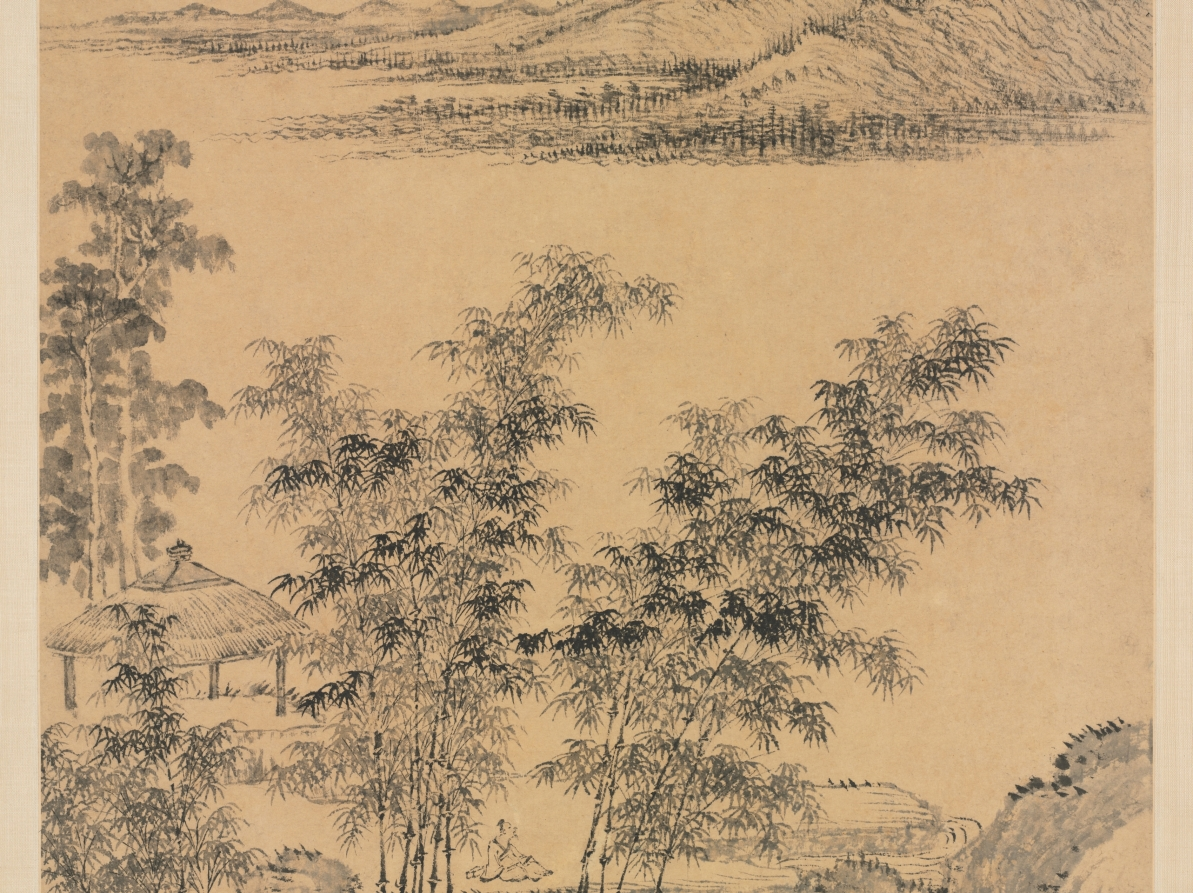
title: Tall Bamboo and Distant Mountains, after Wang Meng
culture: China, Qing dynasty (1644-1911)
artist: Wang Hui (Chinese, 1632–1717)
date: 1694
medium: Hanging scroll; ink on paper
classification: Painting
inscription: 昔文湖州有暮靄橫看。宋思陵題識卷首：觀其筆力不在郭煕之下。於樹石間寫叢竹，乃自其肺腑中流出，又不可以筆墨畦徑觀也。 子文廣文出紙求畫修竹遠山。惜乎僕之筆力，不能似郭。又敢彷彿湖州也哉？至若拙朴鄙野，縱意塗抹，聊可以寫一時之趣。姑塞廣文之雅意云。黃鶴山中人王蒙書。 歲次甲戌九月望後三日為冝翁先生臨于長安寓齋。海虞, 王翬。[印]王翬之印; 石谷子.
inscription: 3 additional seals: 1 of Pang Yuanji 龐元濟 (1864–1949); 2 unidentified.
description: Wang Hui studied paintings by earlier masters and digested their styles with unceasing virtuosity. He had such enduring affection for a landscape by Wang Meng 王蒙 (about 1308–85) that between 1686 and 1712, he made several copies, like this example. One of his compositional transformations here was moving the scholar from the pavilion directly into the landscape by the stream. His faithful copying also included inscriptions. Wang Meng had written that he was trying to resuscitate the style of an earlier artist, Wen Tong (1018–1079); therefore, Wang Hui sought to revive both Wang Meng and Wen Tong.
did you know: As a leading figure in the Orthodox School of Chinese painting, Wang Hui believed that the act of painting was a dialogue with one or more masters of the past.